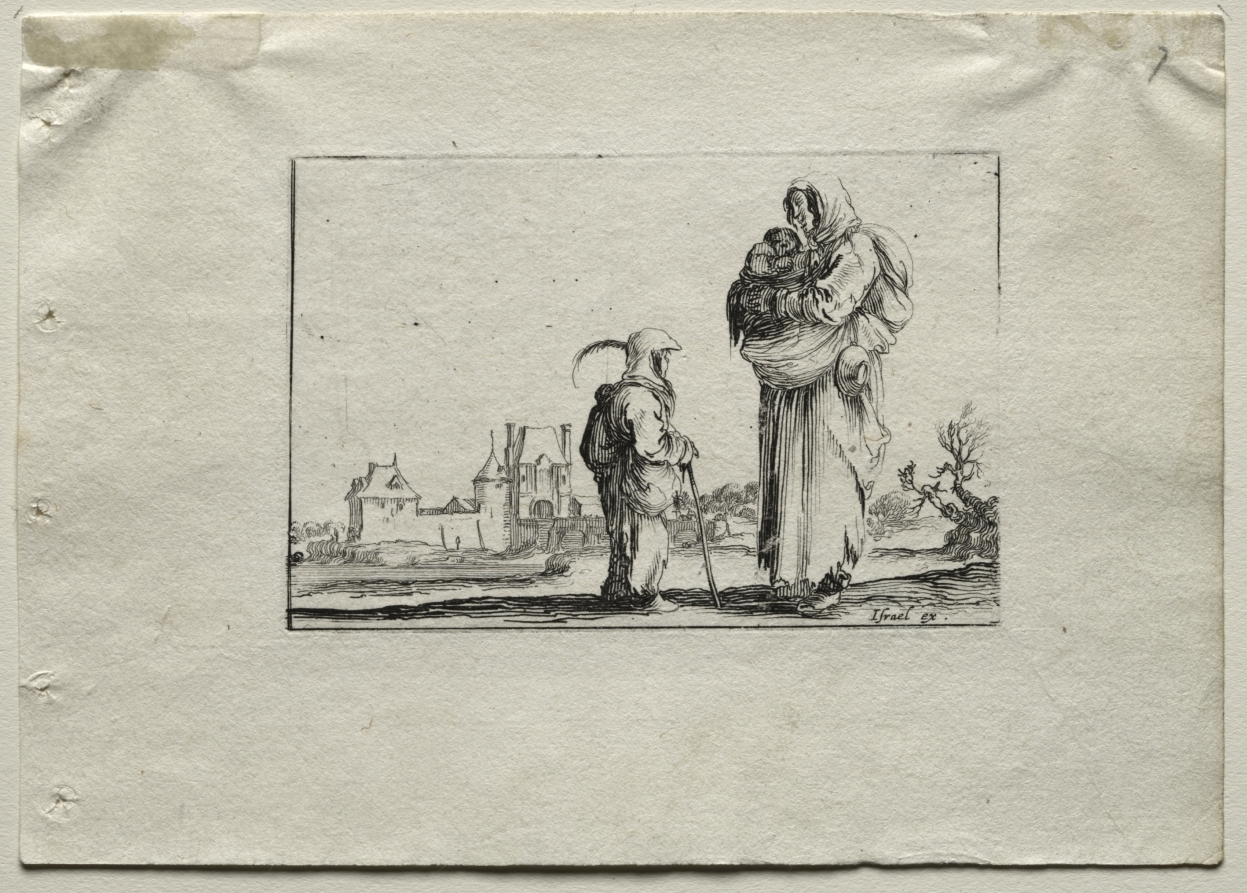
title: Caprices: Beggar Woman with a Baby and a Little Girl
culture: Italy, 17th century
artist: Stefano Della Bella (Italian, 1610–1664)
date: c. 1642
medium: etching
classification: Print